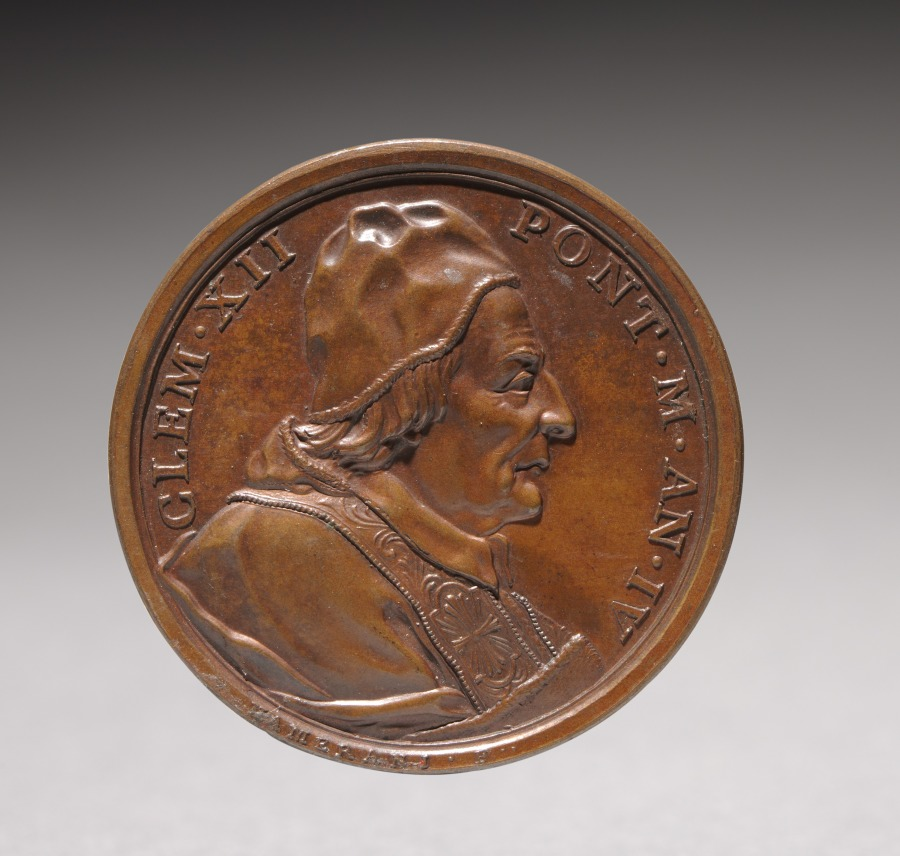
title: Portrait of Pope Clement XII Corsini (obverse and reverse)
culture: Italy, Rome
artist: Ottone Hamerani (Italian, 1694–1761)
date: 1734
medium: bronze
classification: Sculpture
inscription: inscribed: CLEM.XII.PONT.M.AN.IV.HAMERANI.F.